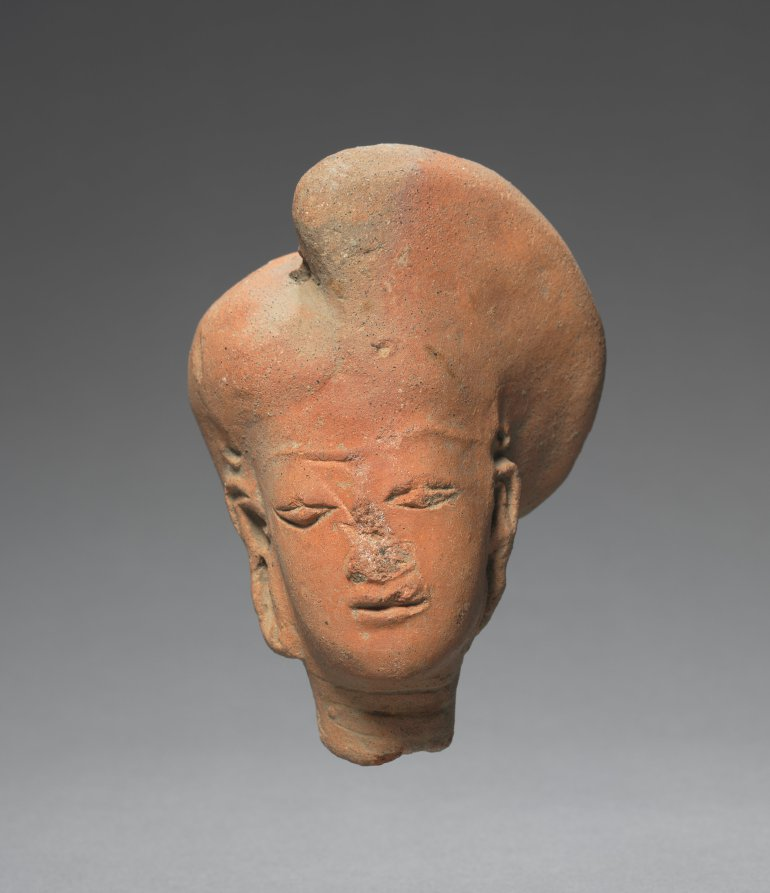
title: Head of a Woman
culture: Java, Majapahit period (1294–1478)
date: 1300s–1400s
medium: terracotta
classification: Sculpture